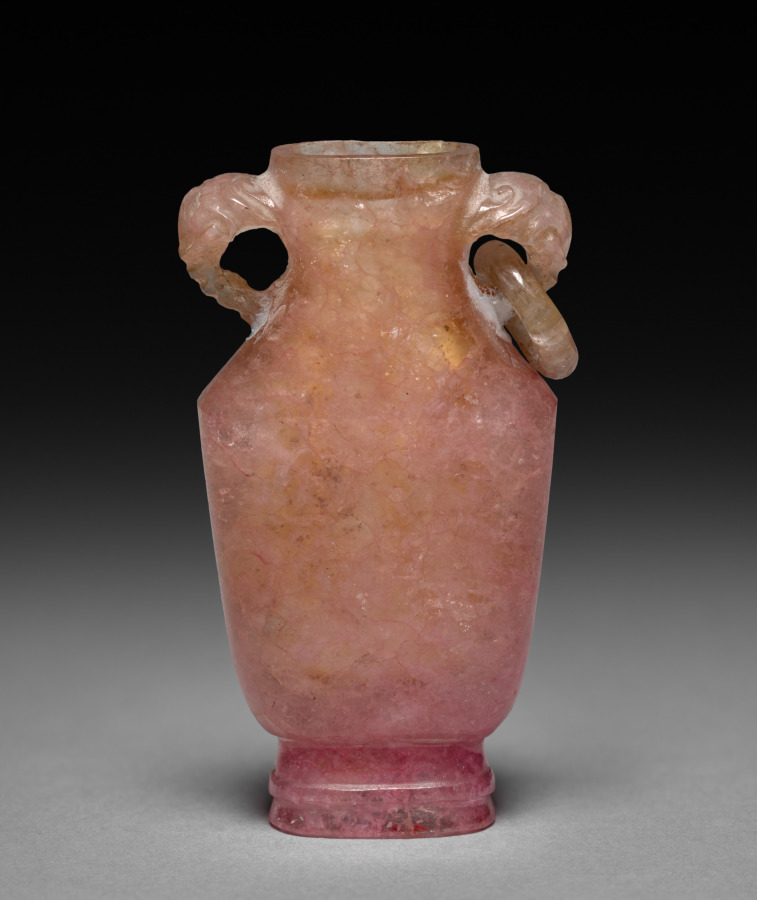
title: Miniature Jar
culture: China, Qing dynasty (1644-1911)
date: 19th-early 20th century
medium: jade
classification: Jade